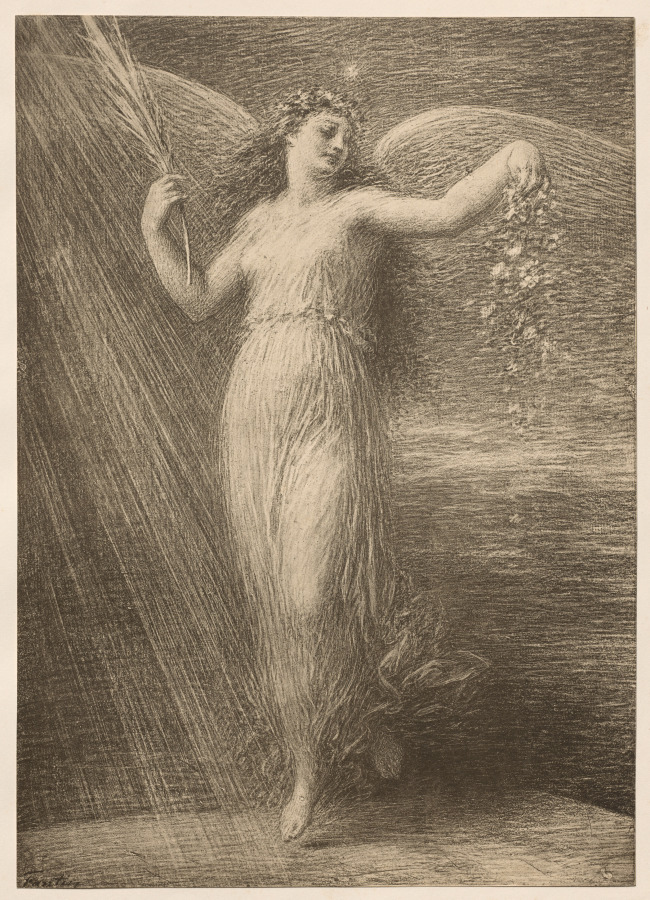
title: Immortalité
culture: France, Paris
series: L'Estampe Moderne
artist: Henri Fantin-Latour (French, 1836–1904)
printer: Imprimerie Champenois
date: 1898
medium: lithograph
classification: Bound Volume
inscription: In plate: lower left corner of sheet: Fantin; lower right corner of secondary support: blindstamp of l'Estampe Moderne (Lugt 2790)